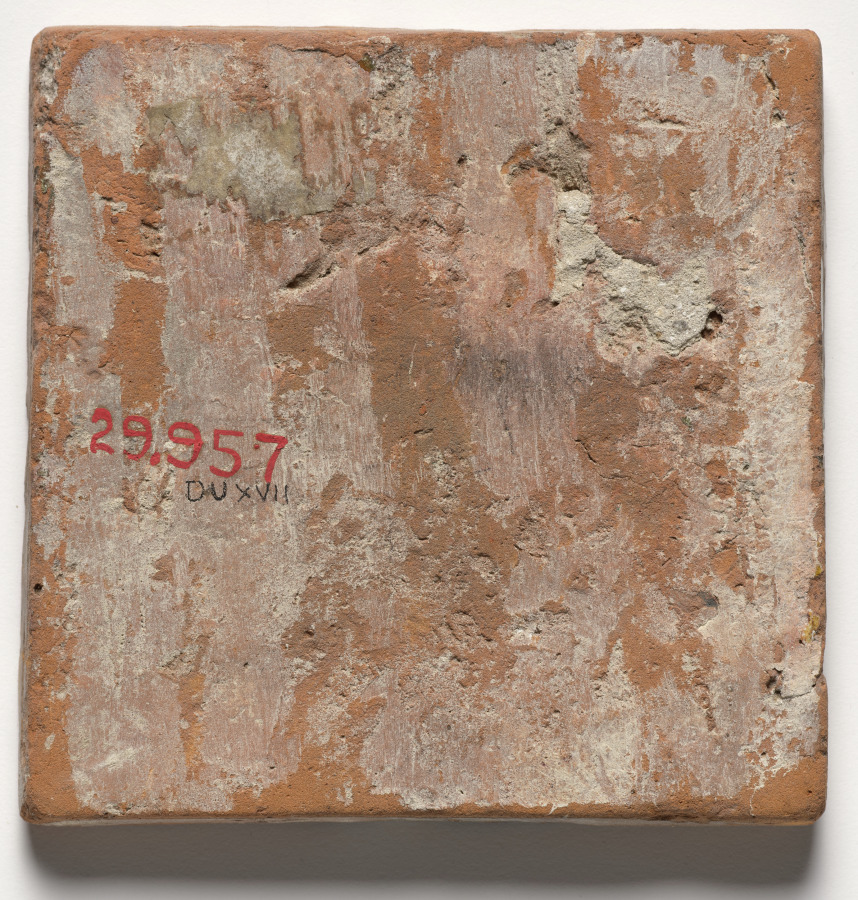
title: Tile- Diamond Medallion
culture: Netherlands, Holland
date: c. 1600s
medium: glazed ceramic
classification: Ceramic